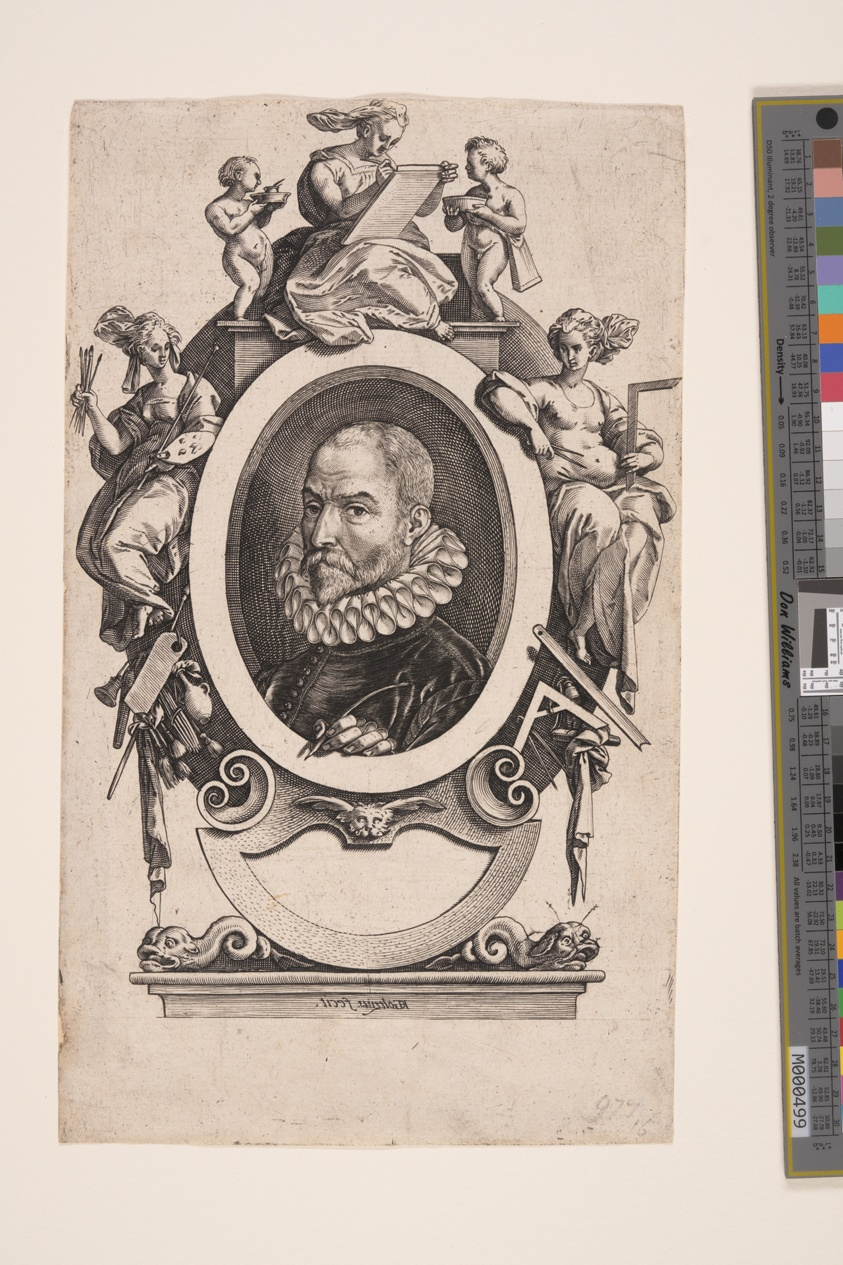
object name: Print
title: Johannes Stradanus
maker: Hendrick Goltzius (Dutch, 1558–1617)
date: 1580/90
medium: Engraving on laid paper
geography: Netherlands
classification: engraving; paper; print; prints and drawing